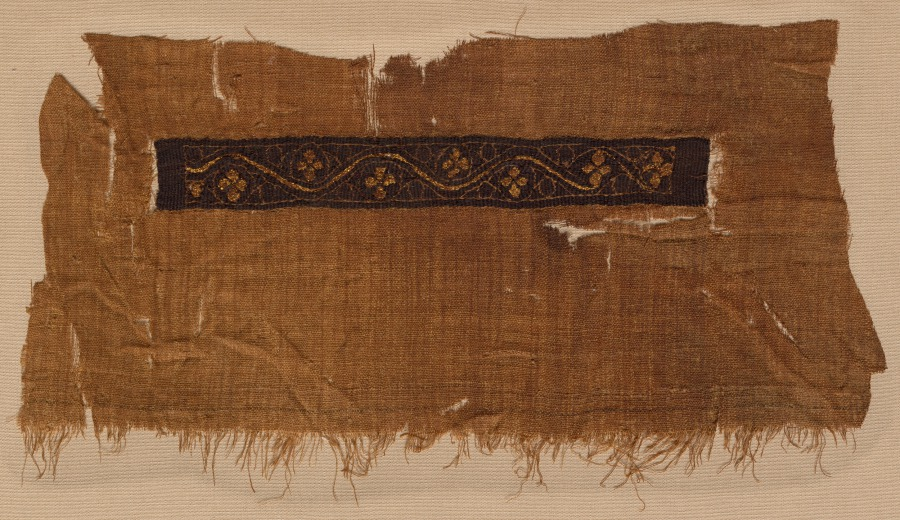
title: Fragment, Probably a Scarf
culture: Egypt, Byzantine period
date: 300s–400s CE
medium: tabby ground with inwoven tapestry ornament; linen, wool, and gold foil around gummed silk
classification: Textile